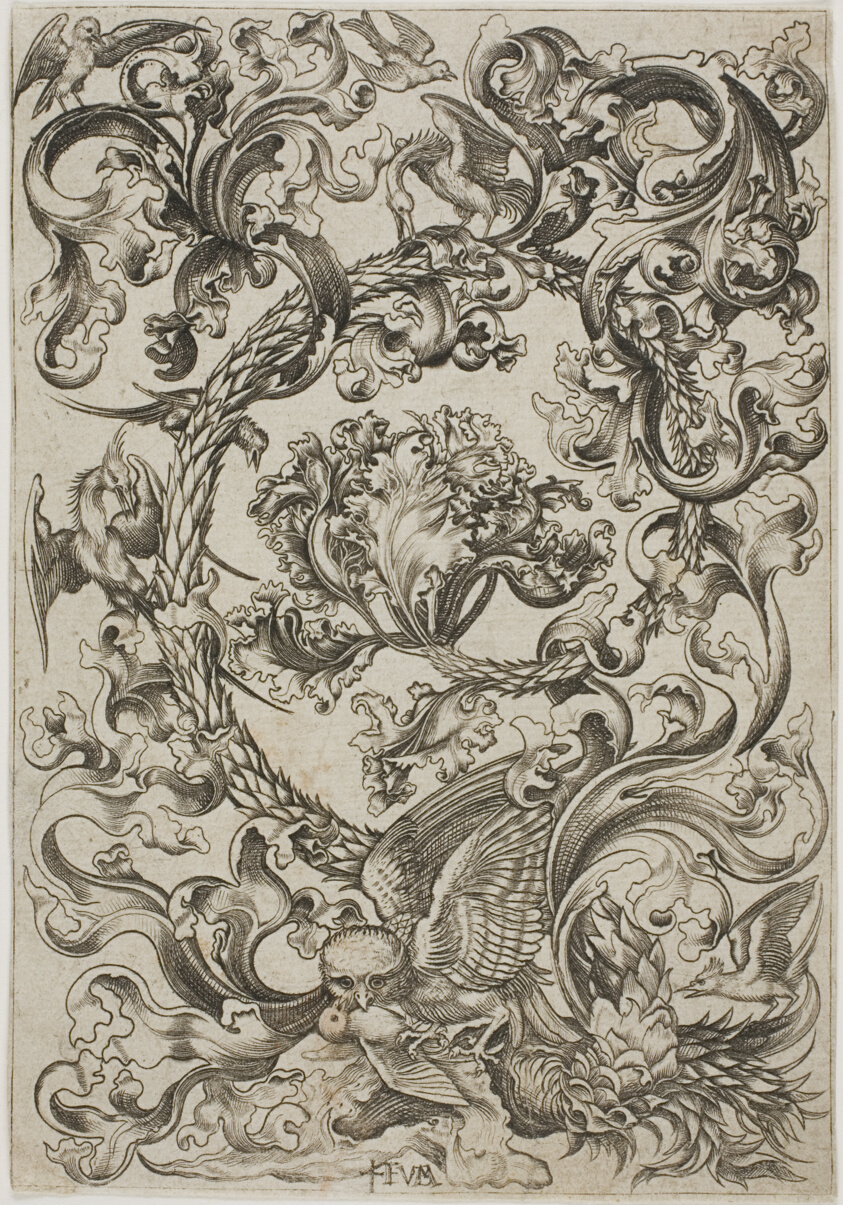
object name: Print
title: Ornament with Owl Mocked by Day Birds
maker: Master F.V.B. (Netherlandish, active 1475-1500); after Martin Schongauer (German, c. 1430/50-1491)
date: c. 1480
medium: Engraving on cream laid paper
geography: Netherlands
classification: engraving; print; prints and drawing